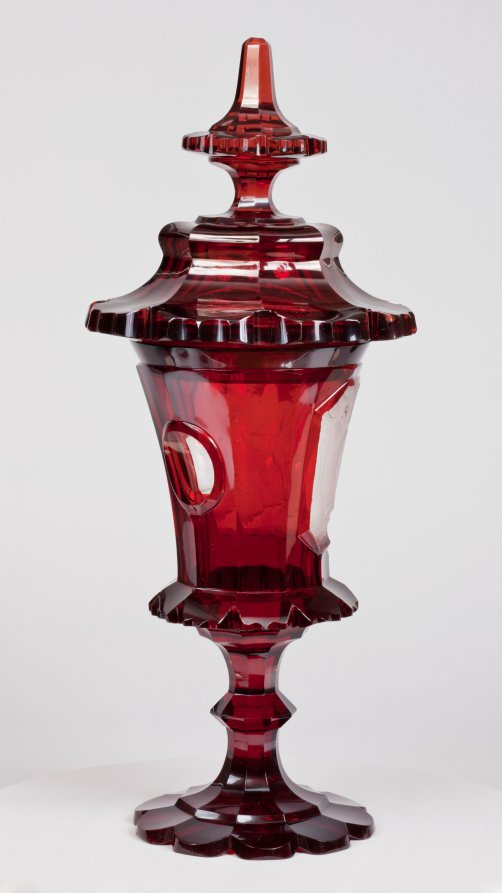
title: Covered Cup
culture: Bohemia, 19th century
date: mid-1800s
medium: ruby glass with engraved decoration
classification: Glass